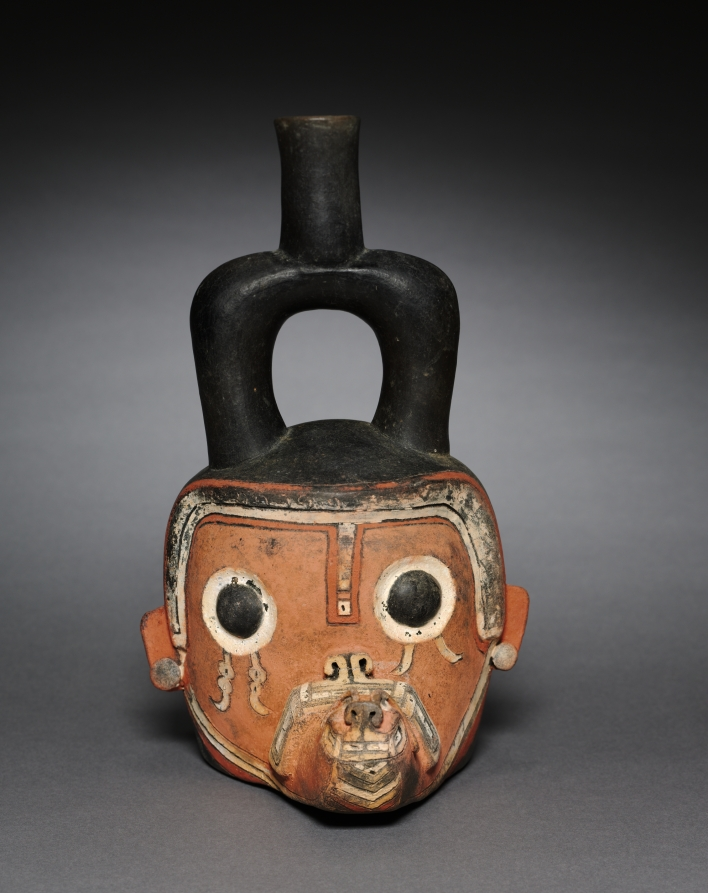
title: Deity-Head Vessel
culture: Peru, North Coast, Tembladera people, Early Horizon (900-400 BCE)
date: 900–400 BCE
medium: ceramic with pigment applied after firing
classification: Sculpture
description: This is a stirrup-spouted vessel shaped as the effigy of a deity head with bulging, circular eyes from which hang pendants. A fanged, bandlike mouth is arranged horizontally on top of a projecting chin that is tipped with a three-dimensional, zoomorphic head. A chin strap reaches between two modeled knobs that double as ear ornaments, and the underpart of the chin is ornamented with chevrons. The face is painted red, yellow, and white over the burnished gray-black surface of the ceramic.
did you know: The Tembladera style is one of several very early styles that developed on the northern desert coast of Peru.